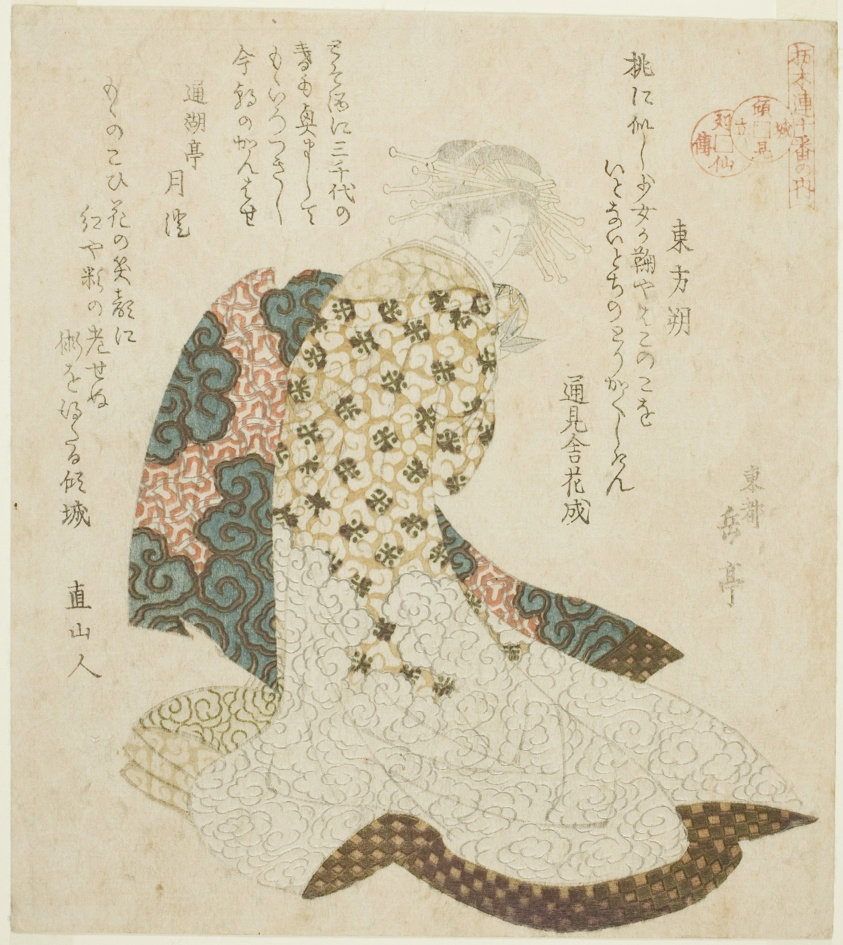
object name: Print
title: Dongfang Shuo (Tohosaku), from the series "Lives of Taoist Immortals Parodied by Courtesans - A Series of Seven (Keisei mitate ressenden, nanaban no uchi)"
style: Japanese (culture or style)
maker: Yashima Gakutei (Japanese, 1786 (?)-1868)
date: c. 1821/22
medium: Color woodblock print; shikishiban, surimono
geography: Japan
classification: woodblock print; print; asian art